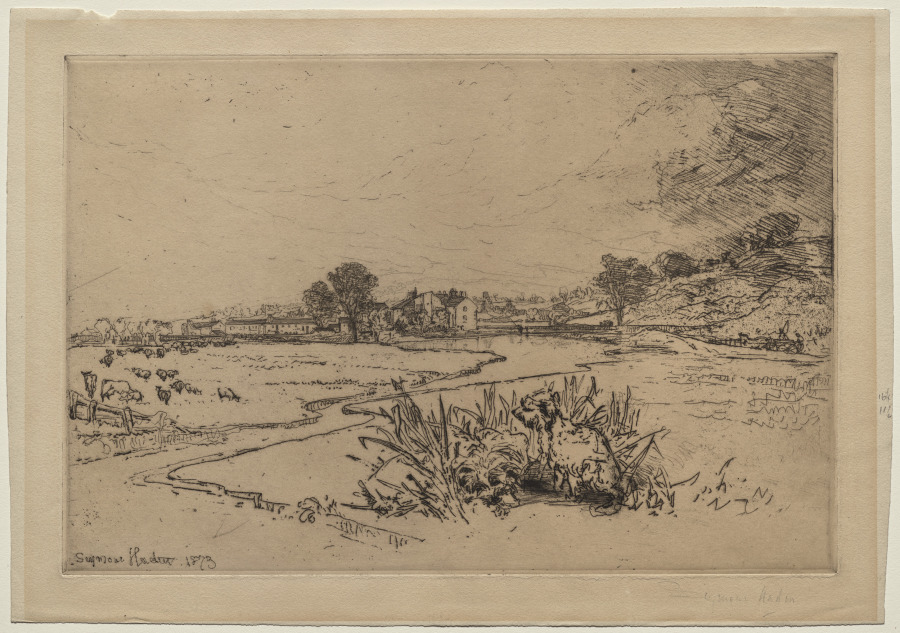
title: Sawley Abbey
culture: England, 19th century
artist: Francis Seymour Haden (British, 1818–1910)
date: 1873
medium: etching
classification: Print